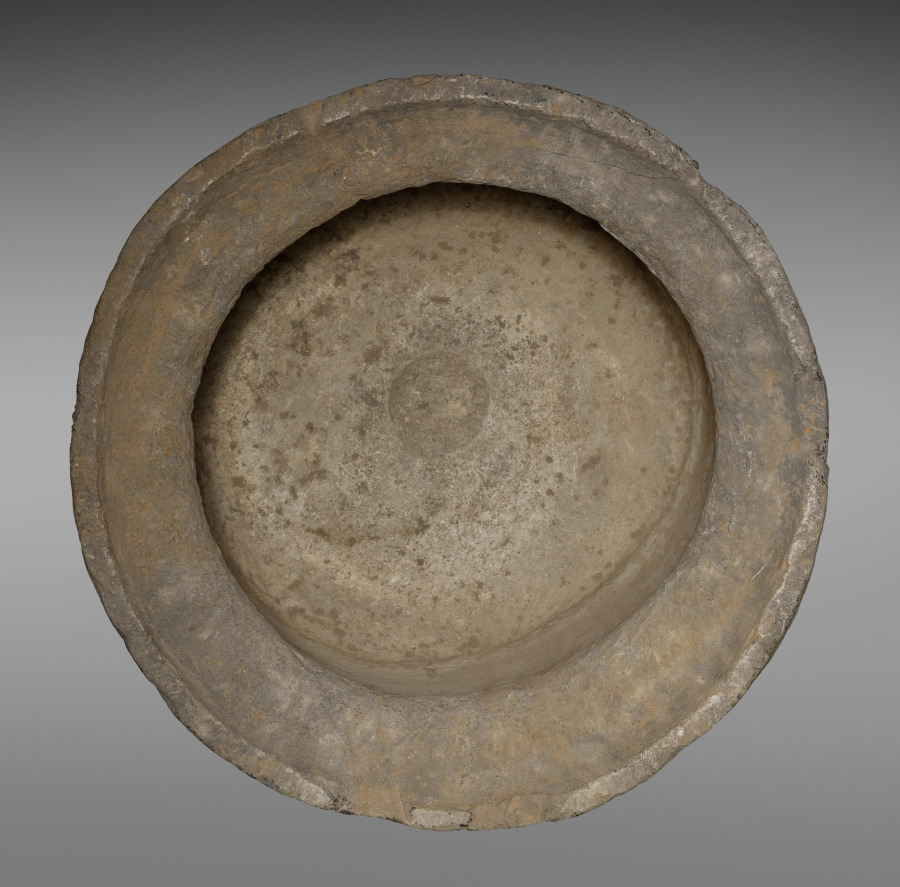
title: Garden Pot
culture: Italy, 19th century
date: 19th Century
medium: stone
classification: Miscellaneous